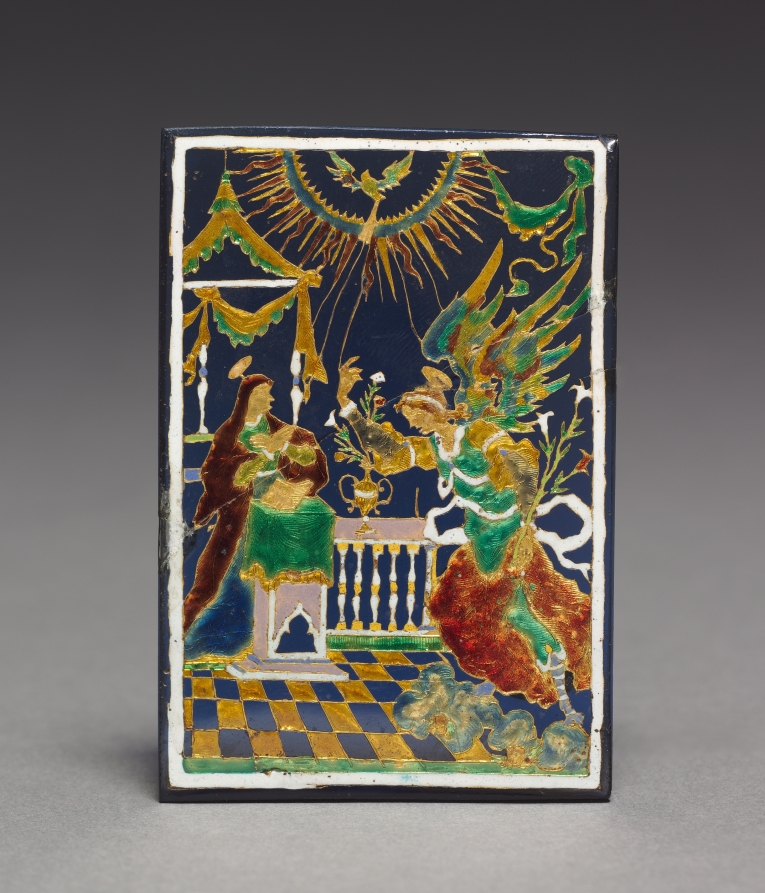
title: The Annunciation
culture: Germany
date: c. 1625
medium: enamel on glass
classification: Glass